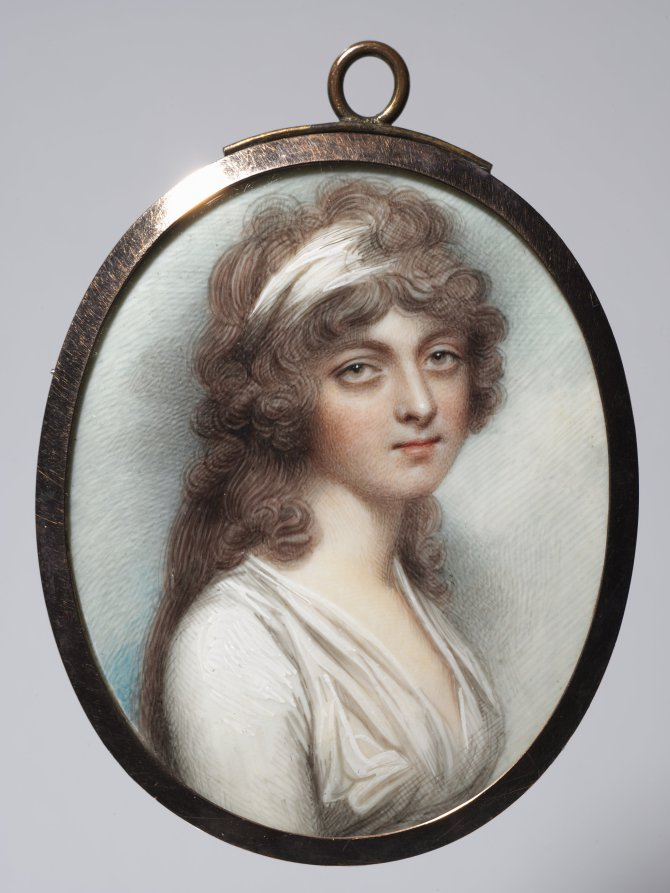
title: Portrait of Anna Walmesley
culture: England, 18th century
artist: Andrew Plimer (British, 1763–1837)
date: 1795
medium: watercolor on ivory in a gold frame with hair reverse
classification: Portrait Miniature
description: Sons of a clockmaker, Nathaniel Plimer and his younger brother Andrew initially trained in their father's profession, although they grew restless with this trade, and ran off to live with Gypsies for two years. By 1781, they were together in London, and determined to practice art. Both took up residence with established artists. Nathaniel worked as a servant to the enamelist Henry Bone, and Andrew became the valet to the portrait and miniature painter Richard Cosway. Cosway discovered Andrew copying one of his miniatures and introduced him to miniature painting. Andrew assimilated his master's airy execution and adapted Cosway's linear brushwork that leaves much of the bare ivory visible. He also employed Cosway's use of large, expressive eyes that made his miniatures appear soulfully elegant, earning him high praise among legions of admirers. A quick study, Andrew set up his own studio by 1786 and he exhibited regularly at the Royal Academy of Arts from 1786–1830. Andrew Plimer's works fall into two phases. In the first, his sitters appear more naturalistically rendered than those painted after around 1789. During the earlier period he frequently included his initials, "A.P.," on the front of the miniature, followed by a date. By contrast, he did not sign or date works in the second phase. Furthermore, in Andrew's second phase of work, he reduced his palette and, perhaps due to his high output, sitters share many visual characteristics; in particular, his women have elongated necks, long noses, and large appealing eyes.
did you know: Engraved on the top of the frame is the name Anna Walmesley, but because this was a common name, the museum has yet to discover any information about the sitter or to confirm her identity.